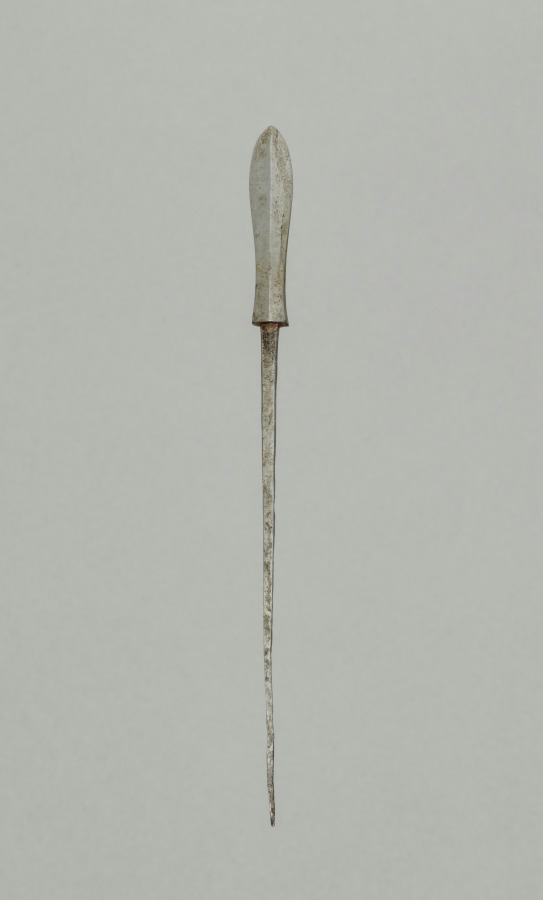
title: Arrow Point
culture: Japan, Edo period (1615–1868)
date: 1700s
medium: steel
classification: Arms and Armor